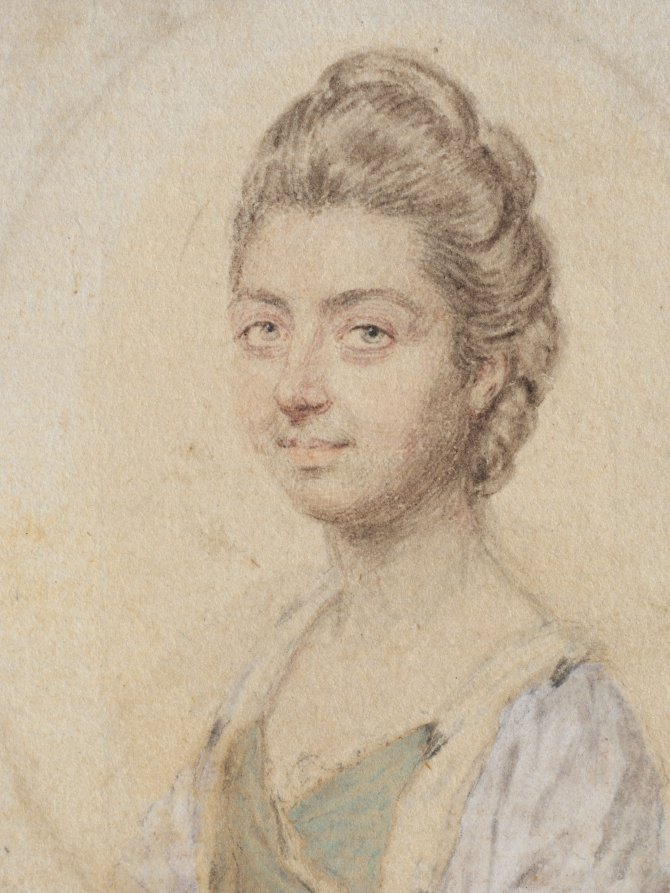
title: Portrait of Sukey, Lady Oglander, née Serle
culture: England, 18th century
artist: John I Smart (British, 1741–1811)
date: c. 1770s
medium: graphite and wash on laid paper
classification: Portrait Miniature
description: Although it is impossible to say if it was always part of the artist’s process to execute a preparatory sketch prior to painting each miniature, we do know that John Smart retained many hundreds of these sketches. A group of preparatory sketches—of which this portrait is one—descended through the Smirke family after Smart’s daughter Sarah gave a sketchbook containing preparatory portrait studies to her friend Mary Smirke, sister of the celebrated Victorian architect Sydney Smirke. This book was probably broken up around 1877 when it was divided between Sydney’s daughters Mary Jemmett and Mrs. Lange, whose portions were both sold at auction in 1928. G. C. Williamson was the first to suggest that Smart’s sketches were well known and that they were preparatory studies for the painted miniatures. Williamson listed the names of sitters from the sketches known to him at the time, and they include Lady Oglander. This portrait was assigned the historically colorful but fictitious title of “Duchess of Bourbon” at some point after memory of its true identity had been lost. Giving illustrious titles to portraits of unknown sitters was a popular strategy adopted by dealers during the nineteenth and twentieth centuries, often applied to miniature portraits and, in particular, to Smart’s sketches of women. However, when the paper backing was removed from this miniature, the name Lady Oglander was discovered written twice in graphite on the back. The lower inscription seems to have been reinforced or written later and is probably not in the artist’s hand. Compared to his contemporaries George Engleheart (1752–1829) and Andrew Plimer (1763–1837), whose female sitters were often painted in similar simple white gowns, Smart often lavished more attention on the costumes in his portraits of women, whose dresses incorporated colored silks, printed fabrics, and luxury trimmings like lace and fur, as seen here. The sitter’s head and shoulders face right, and her light hair is dressed high, with flat curls at the back of her head. She has gray eyes and wears a lavender surcoat trimmed with ermine, over a turquoise blue, low-necked dress and white underslip bordered with lace; the ermine trim confirms that the sitter was a titled lady. Smart placed her inside a faintly suggested oval, and the background is unpainted. Sukey, Lady Oglander (née Serle, d. 1805), married Sir William Oglander, 5th Baronet of Nunwell (1733–1806), in 1765. She was the only daughter of Peter Serle of Testwood, Hants, and delighted the Oglander family by bringing £10,000 to the marriage. Sukey had eleven children with William, eight of whom survived childhood. The Oglanders were a prominent and well-loved family on the Isle of Wight, their presence on the island first dating from the time of William the Conqueror and lasting until the title expired in 1874 when the last Oglander Baronet of Nunwell died. This preparatory sketch somewhat resembles a miniature on ivory of the same size that sold at Christie’s, London, in 2000. The sitter’s name is unknown, but she wears a nearly identical green wrap gown and underslip and a lavender surcoat, though it is trimmed with brown fur rather than ermine. Her coiffure is similar to that in the preparatory sketch as well, though in the ivory her hair is ornamented with pearls. The facial features, however, differ, with the sketch representing an older woman having somewhat coarser features. While the portrait may have been idealized in the finished ivory version, it is also possible that the sketch was employed primarily for the costume and depicts another sitter entirely. Daphne Foskett lists among Smart’s work portraits of a Dr. John Oglander and a Lady and Miss Oglander. A preparatory sketch by Smart of a Mr. Oglander sold at Christie’s, London, on June 10, 2010. Another preparatory sketch titled Portrait of John Oglander, Warden of New College, Oxford, was sold at Bonhams, London, on October 30, 2001. These sketches are approximately the same size as Cleveland’s Lady Oglander and may have been commissions related by date or patron. The sale of Smart drawings inherited by W. H. Bose and sold at Christie’s, London, in 1937 included a “Head of Miss Oglander,” “sister to Sir John Oglander of the Isle of Wight,” but this lot was not illustrated, and its relationship to the sketch discussed here is unknown. John Oglander, Warden of New College, Oxford, was the brother-in-law of Sukey, Lady Oglander, and Miss Oglander was probably her sister-in-law Susannah Oglander (d. 1816).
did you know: Sketches helped John Smart work out the particulars of a portrait before commencing the miniature on ivory, and they were useful in the event that a duplicate might later be required.